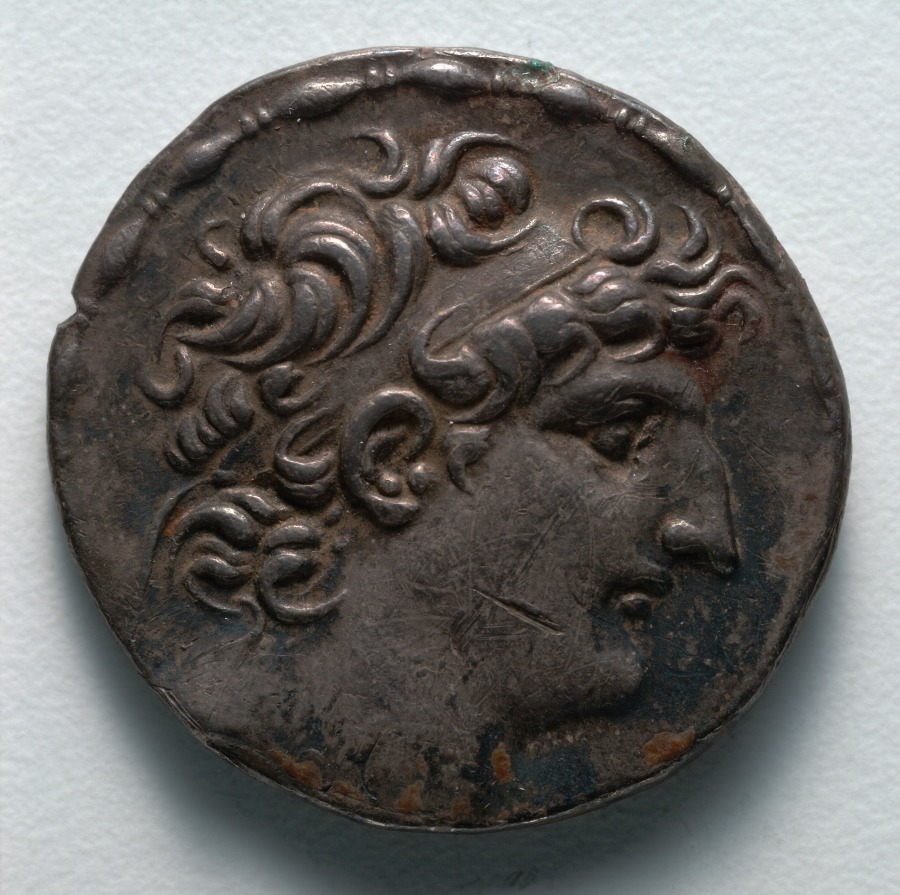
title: Tetradrachm: Head of Antiochos VIII (obverse); Zeus Ouranios (reverse)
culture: Greek, Seleukid, minted at Antioch (Syria), reign of Antiochos VIII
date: 112–110 BCE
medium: silver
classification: Coins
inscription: ΒΑΣΙΛΕΩΣ | ΑΝΤΙΟΧΟΥ | ΕΠΙΦΑΝΟΥΣ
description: Like his ancestors before him, Antiochos VIII emulates the style of Alexander III (the Great) on this coin, preferring wild, curly hair, a simple diadem, and clean-shaven face. On the reverse Zeus Ouranios gives his divine approval, standing with a scepter and bright star that shines above two mint marks in a very crowded field.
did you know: The coins of Antiochos VIII are distinguished by his extremely hooked nose and pudgy face.